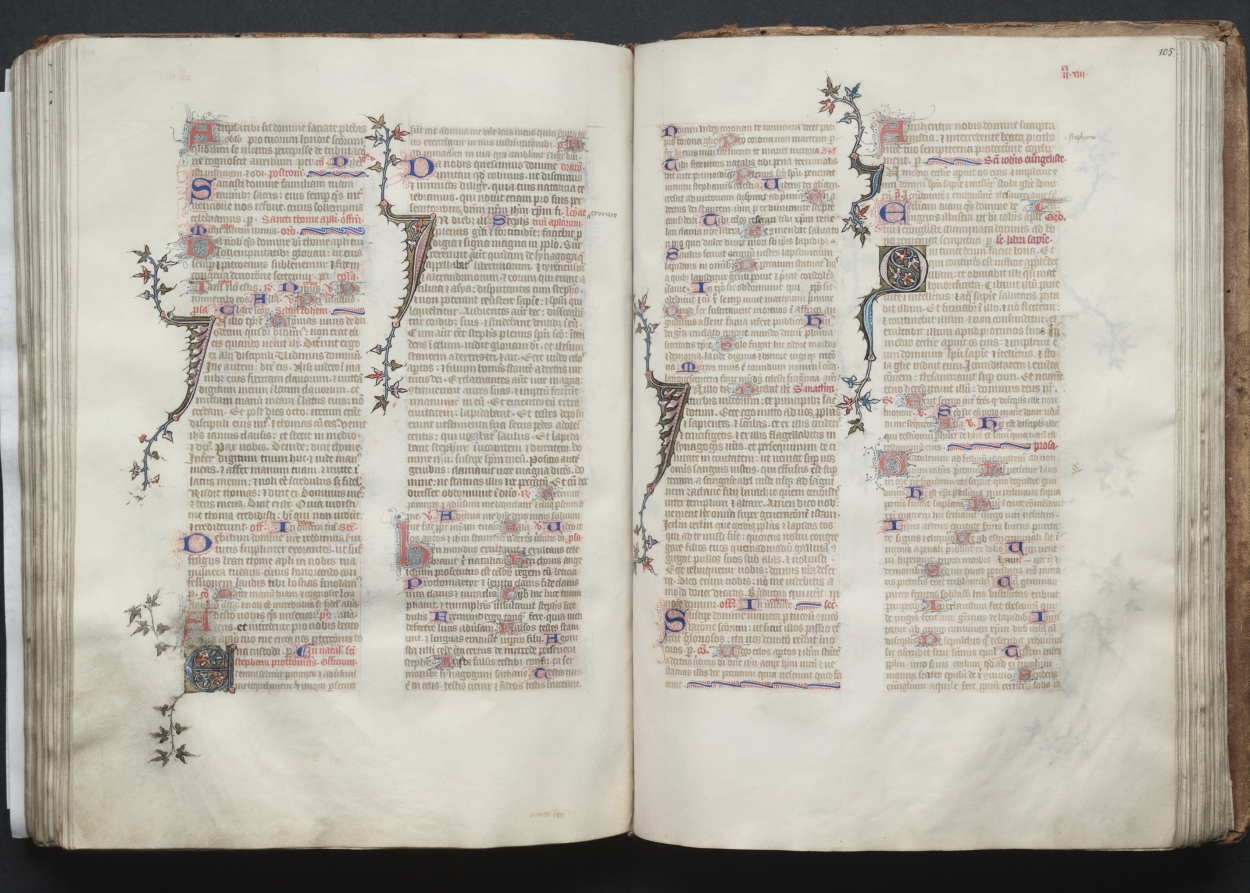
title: The Gotha Missal: Fol. 106r, Text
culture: France, Paris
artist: Master of the Boqueteaux (French)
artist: and Workshop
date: c. 1375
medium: ink, tempera, and gold on vellum; blind-tooled leather binding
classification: Bound Volume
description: The style and quality of this manuscript's decoration is typical of deluxe Parisian books made for aristocratic or royal patrons. Most of the book's decoration appears to be the work of the Master of the Boqueteaux, an artist active at the court of King Charles V (died 1380). His style was apparently shared by a number of book illuminators working in and around Paris. It is very possible that the Gotha Missal belonged to Charles V, but is not provable because the manuscript has no royal portraits and lacks a colophon. Given the book's magnificent decoration, however, it would seem that it was produced for a Valois prince, if not for the king himself. The manuscript receives its name from the German dukes of Gotha, its later owners.